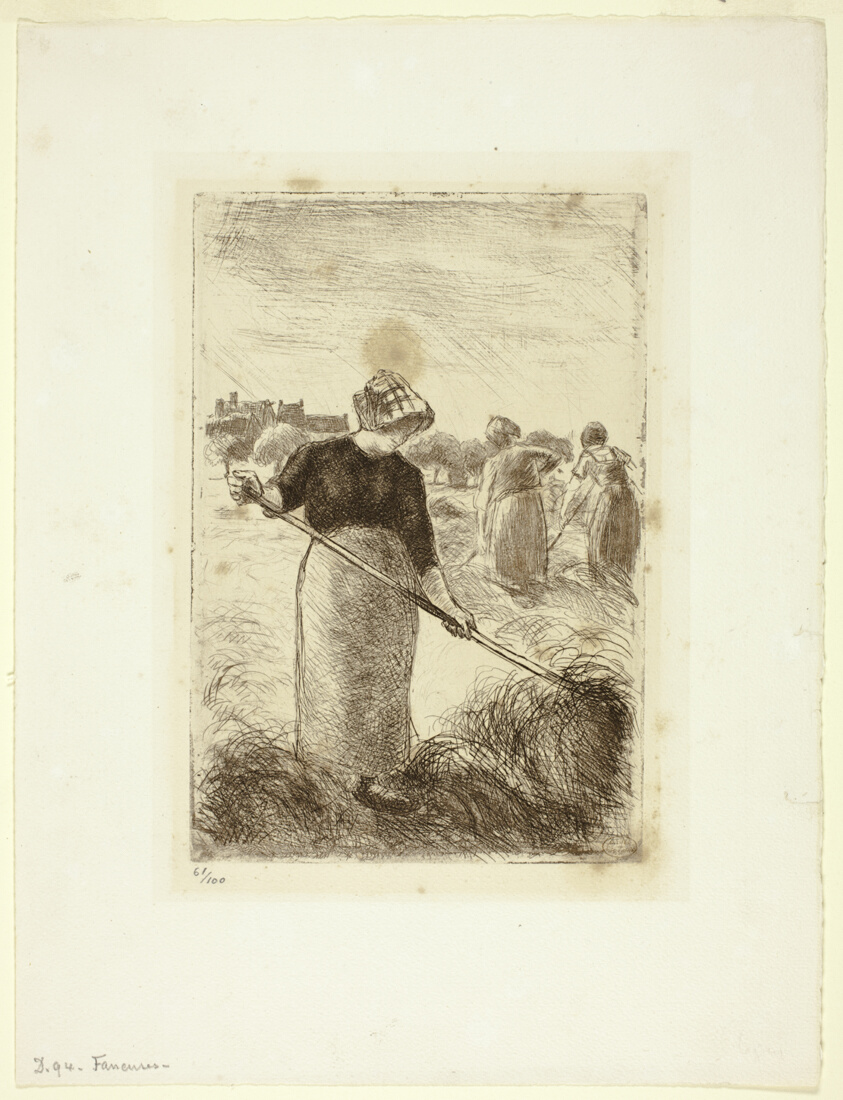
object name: Print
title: Women Tossing the Hay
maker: Camille Pissarro (French, 1830-1903)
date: 1890, printed 1906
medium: Etching in dark brown on ivory laid paper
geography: France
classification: etching; print; prints and drawing